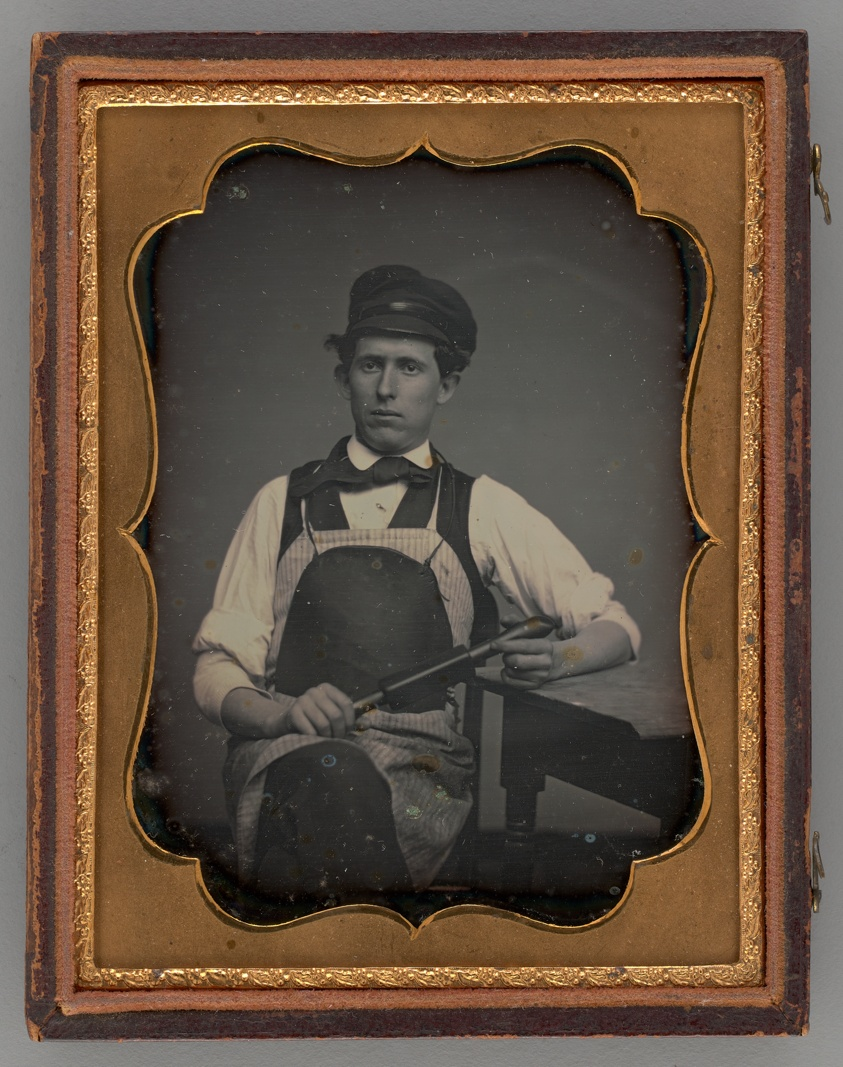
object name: Photograph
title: Untitled (Portrait of a Seated Man)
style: 19th century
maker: Unknown maker; American, 19th century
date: 1855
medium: Daguerreotype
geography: United States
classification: portrait; daguerreotype; portrait; photograph; photographic process; photography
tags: lundberg collection, Male, portrait, portraits, portraits: male subject